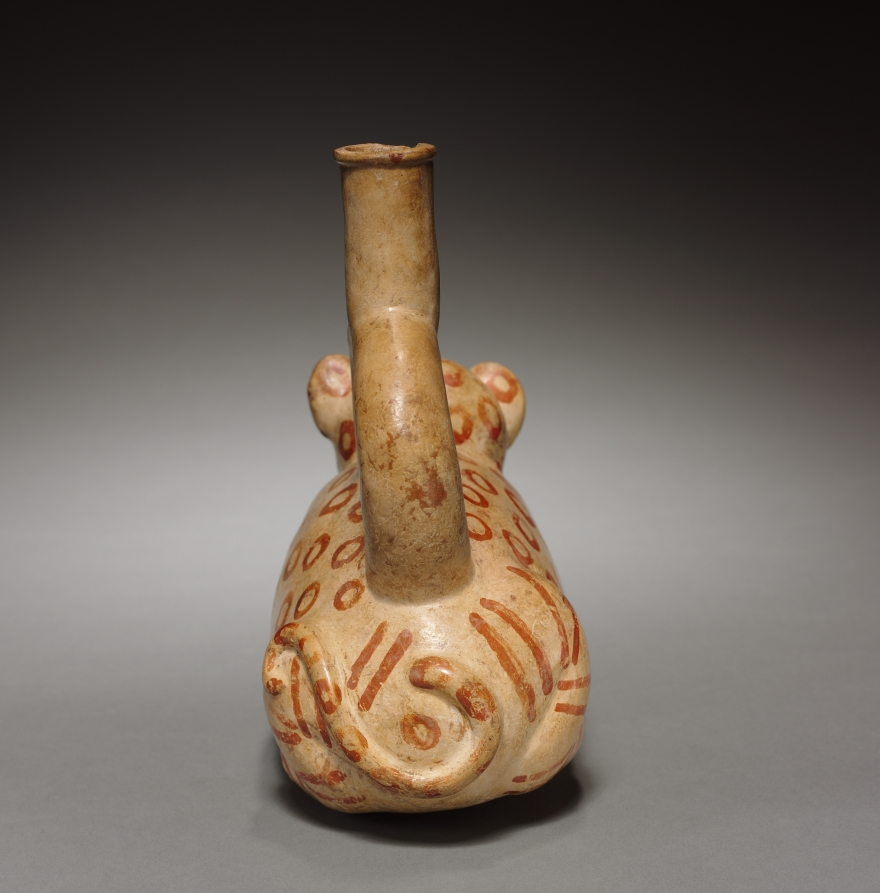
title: Stirrup Spouted Vessel of Feline Form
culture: Peru, Mochica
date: 1–1000 CE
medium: red earthenware decorated with cream-colored slip and brown pigment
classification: Ceramic